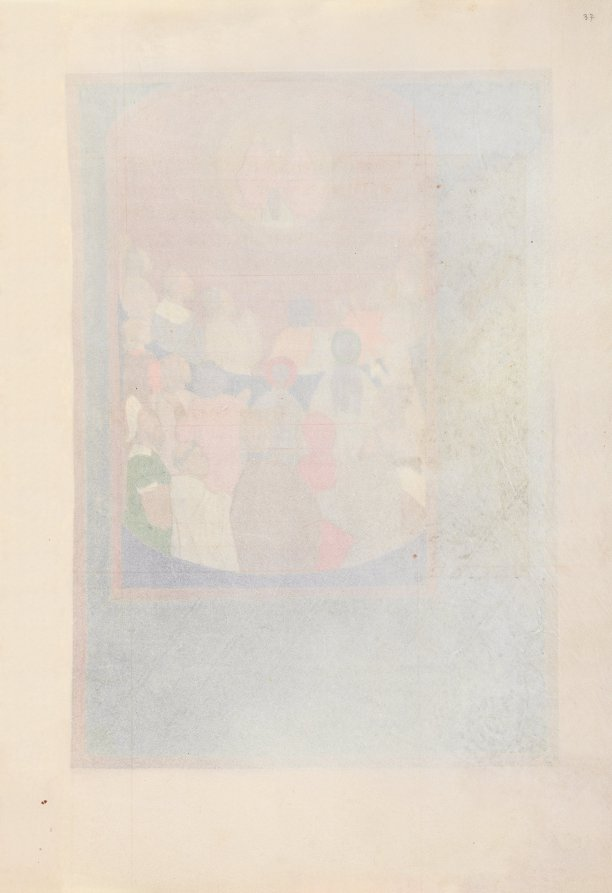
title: Hours of Queen Isabella the Catholic, Queen of Spain: Fol. 37r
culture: Flanders, Ghent and Bruges, late 15th century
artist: Master of the First Prayerbook of Maximillian (Flemish, c. 1444–1519)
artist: and Associates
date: c. 1500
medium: ink, tempera, and gold on vellum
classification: Bound Volume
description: This manuscript was illuminated by a circle of at least five highly organized manuscript painters active in the Flemish cities of Ghent and Bruges. The principal illuminator was Alexander Bening, who painted the majority of the book's miniatures. Manuscripts produced by this circle of artists are renowned for the decoration of their borders, which typically feature a rich variety of realistically-painted flowers, birds, and butterflies. This prayer book, called a book of hours, was intended not for a cleric, but for the private devotions of a lay person-in this case, Isabella the Catholic, Queen of Spain (1451-1504). Isabella's coat of arms embellishes the book's frontispiece. It is unlikely that the book was commissioned by the Queen herself; rather, she probably received it as a diplomatic gift from someone courting her patronage, perhaps Cardinal Francisco Jimenez de Cisneros. A Franciscan friar, Jimenez was dependent upon Isabella for his advancement, first to the post of Queen's confessor in 1492, and then to Archbishop of Toledo in 1495.